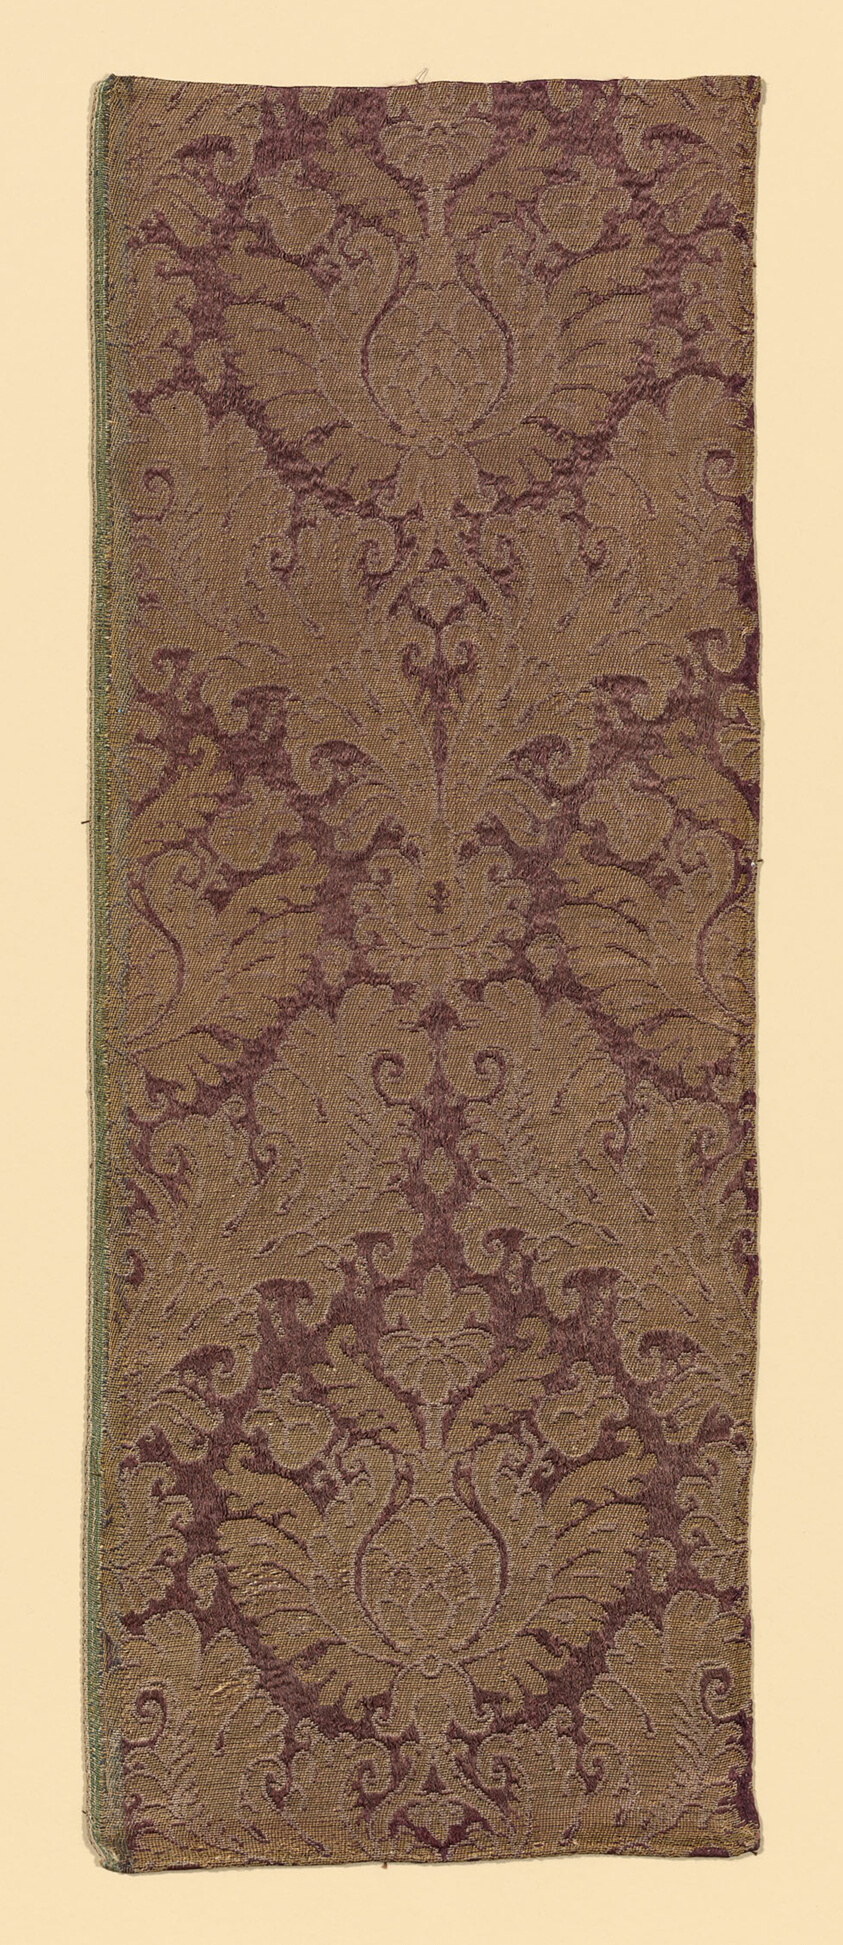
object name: Textile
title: Fragment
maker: Spain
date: 1575/1725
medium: Silk and gold gilt strips, integrated compound weave of warp-float faced satin weave and twill weave with supplementary patterning wefts and self-patterning wefts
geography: Spain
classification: textile; weaving